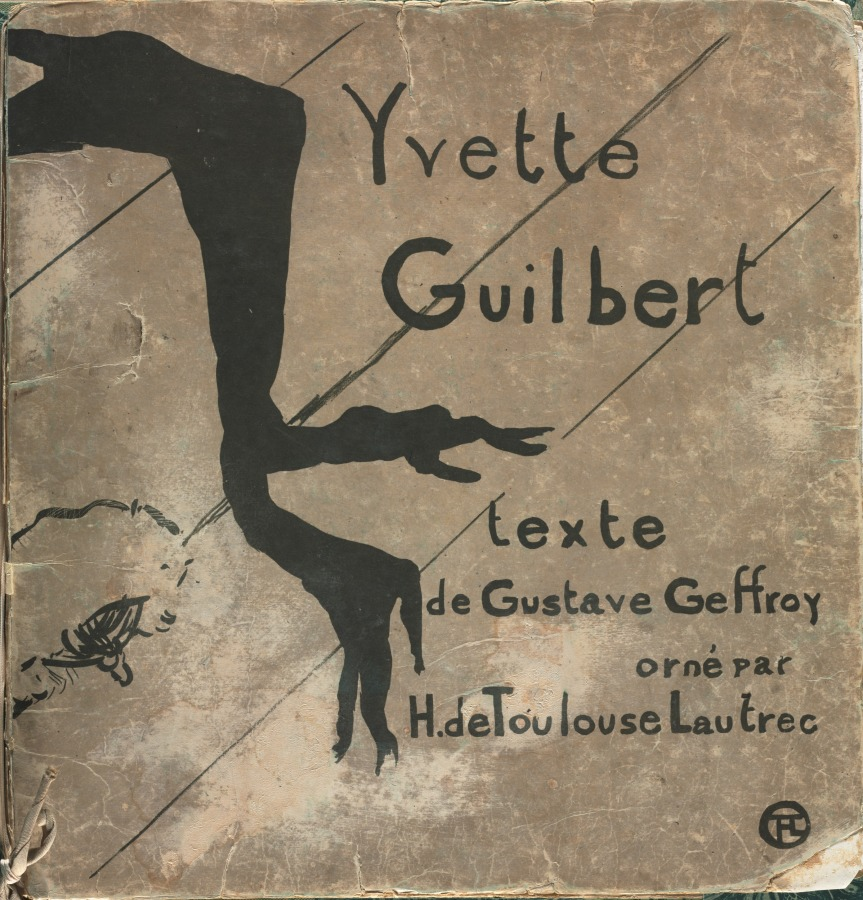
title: Yvette Guilbert - French Series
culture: France, 19th century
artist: Henri de Toulouse-Lautrec (French, 1864–1901)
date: 1894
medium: lithograph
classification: Bound Volume